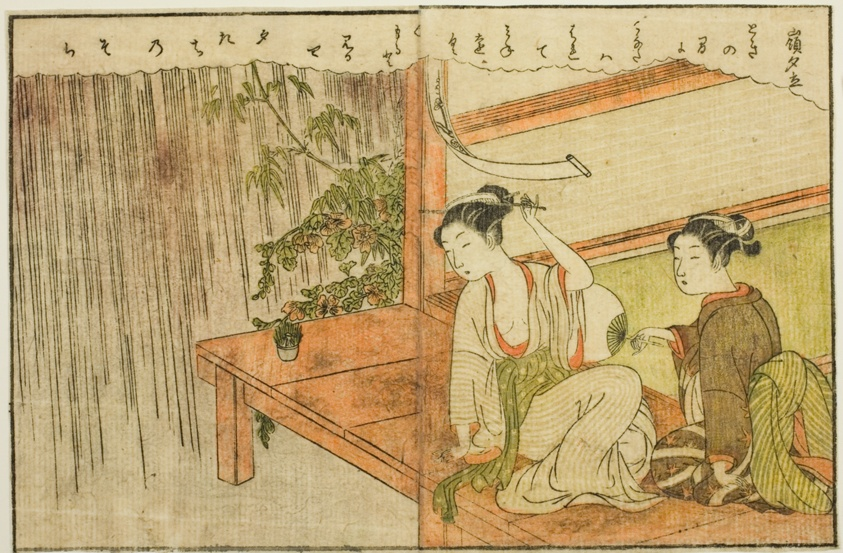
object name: Print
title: Double-page Illustration from Vol. 2 of "Picture Book of Spring Brocades (Ehon haru no nishiki)"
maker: Suzuki Harunobu 鈴木 春信; Japanese, 1725 (?)-1770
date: 1771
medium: Color woodblock print; double-page illustration from book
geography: Japan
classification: woodblock print; print; asian art